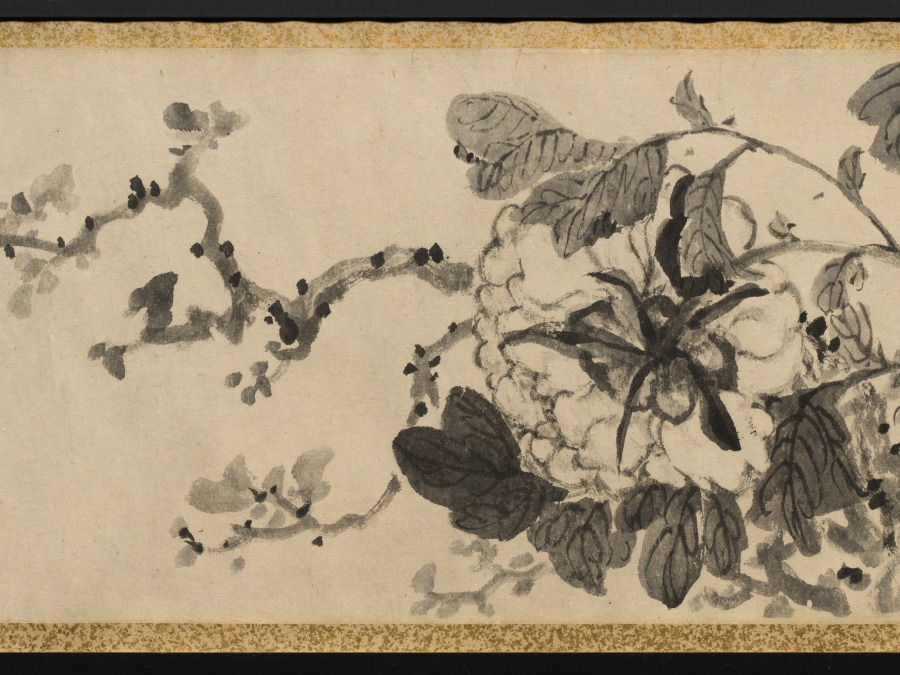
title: Plum Blossoms and Peonies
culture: China, Qing dynasty (1644-1911)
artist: Gao Fenghan (Chinese, 1683–1749)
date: 1741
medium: handscroll, ink on paper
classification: Painting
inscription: Artist's 2 inscriptions and 9 seals (the painting of Peonies with the artist's colophon and the colophon by Hou Chia-fan are on a single sheet of paper). Artist's inscription and 2 seals (Plum Blossoms): [seal] Ts'ai-yün. After finishing writing my colophon, I unrolled the painting to take another look, and it now seems that the composition here should have moved to the later part of the scroll. If that is the case, then the "Cool Beauty" [prunus] of the Solitary Hill is after all unable to take precedence over the "King of Flowers" [peony]. A laugh. Lao-fou inscribed. [seal] Feng-han. Artist's colophon (Plum Blossoms): [3 seals] Tun; Yen-yün-kung-yang, Hou-shang-tso-sheng. A few days after I painted this scroll for Shui- hsien [Yüeh Meng-yüan], the plum blossoms were in full bloom at his residence. He invited me over to enjoy them together for a long while, and I composed two additional poems and wrote them down here for his criticism. [Poems on the colophon are not translated.] First month, twenty-first day, your junior, Kao Feng-han of Nan-fou drafted this with the left hand. [seal] Feng-han. Artist's inscription and 4 seals (Peonies): Brushed with the left hand in the hsin-yu year [1741]. [seal] Yu-hsi. [3 seals at end of painting] Hou-shang-tso-sheng; Yen-yün-kung-yang; Shih-tsao-wu. Artist's colophon and seal (Peonies): The imperial concubine from the Yang family loved to dress in red, And from the emperor won the title of Hai-t'ang. But ever since she became the new dream of the moon palace, She changed into rainbow colors, while learning to dance. After I wrote the poem on Looking for Plum Blossoms in the Teng-wei Mountains, I attached to it a few branches of prunus, some bamboo tips and a piece of rock, with a scattering of green [moss] here and there to fill up the scroll. Unexpectedly, my playful fascination [with these subjects] was still not quite satisfied, so I made up these amorous ideas and romantic images [of the peony], to follow the footsteps of the fair lady of the Ku-hsieh Mountain [prunus]. Furthermore, I picked out one poem to be my vanguard. Perhaps such luminosity of wealth and power will be enough to overwhelm the poor fellows, and [they] will not mind the comparatively short length [of paper] assigned to it. Amusingly inscribed. Please correct me again. To Shui-hsien, my learned senior, your junior Han inscribed again. [seal] Tso-hua [left-handed painting]. 1 additional colophon and 5 additional seals: 1 colophon, dated 1742, and 3 seals of Hou Chia-fan (act. ca. 1742); 1 seal of P'u Ch'üan (20th c.?); 1 seal of Li family (dates unknown).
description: One of the so-called Yangzhou Eccentrics (a group of painters who lived in Yangzhou and were known for their unorthodox art and lifestyle), Gao Fenghan depicts China’s two most loved flowers in full bloom—the “cold beauty,” or plum blossom, in the first section, and the “king of flowers,” or peony, in the second section. Painted in 1741, the year when Gao decided to leave the south and return home to Shandong province in eastern China, this work was likely a token of farewell. His casual brushwork may indicate his mental and physical struggle at the time. After having crippled his right hand in 1737, Gao used his left hand to paint and achieved a crudeness and eccentric style unattainable before.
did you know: In East Asian art, peonies traditionally symbolize prosperity and wealth.